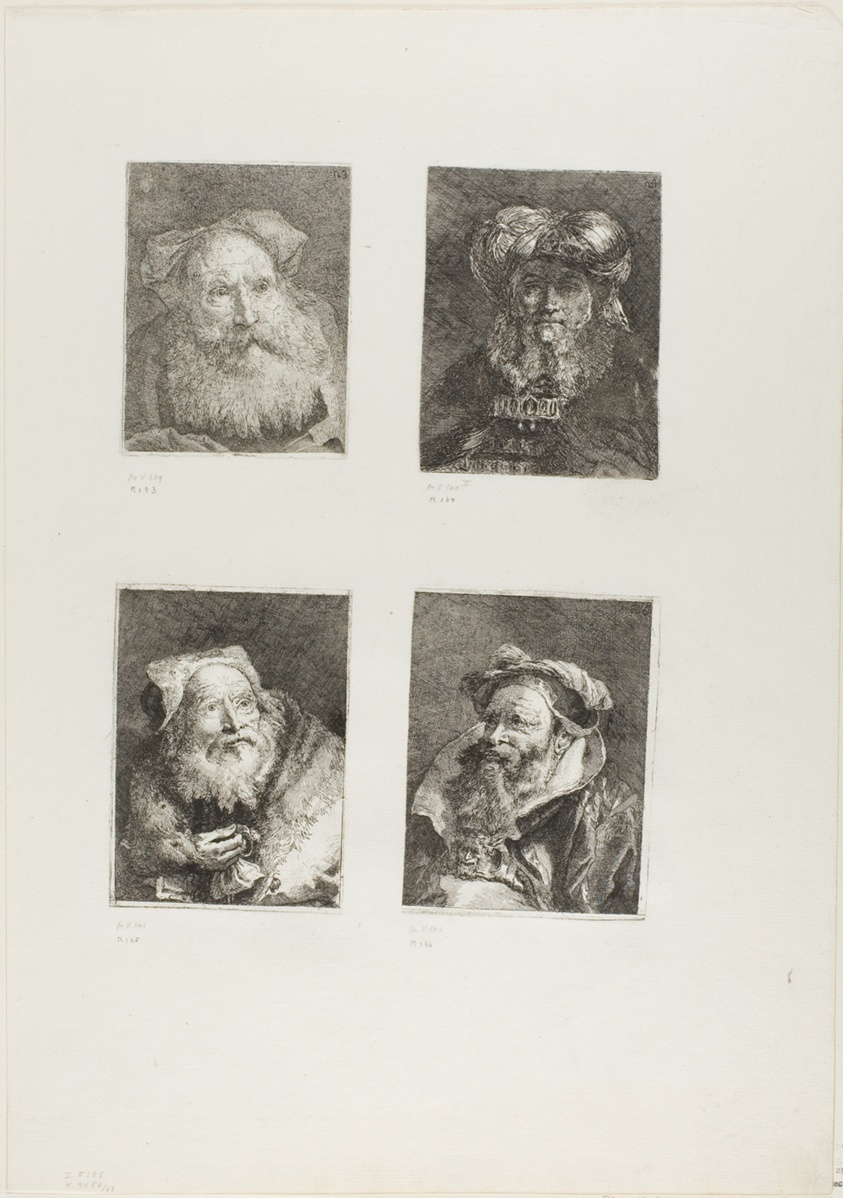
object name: Print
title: Old Man with a Beard, Old Man in the Manner of Rembrandt, Old Man with a Bracelet, Old Man with a Beard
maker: Giovanni Domenico Tiepolo (Italian, 1727-1804)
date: 1775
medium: Four etchings on ivory laid paper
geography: Italy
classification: etching; print; prints and drawing